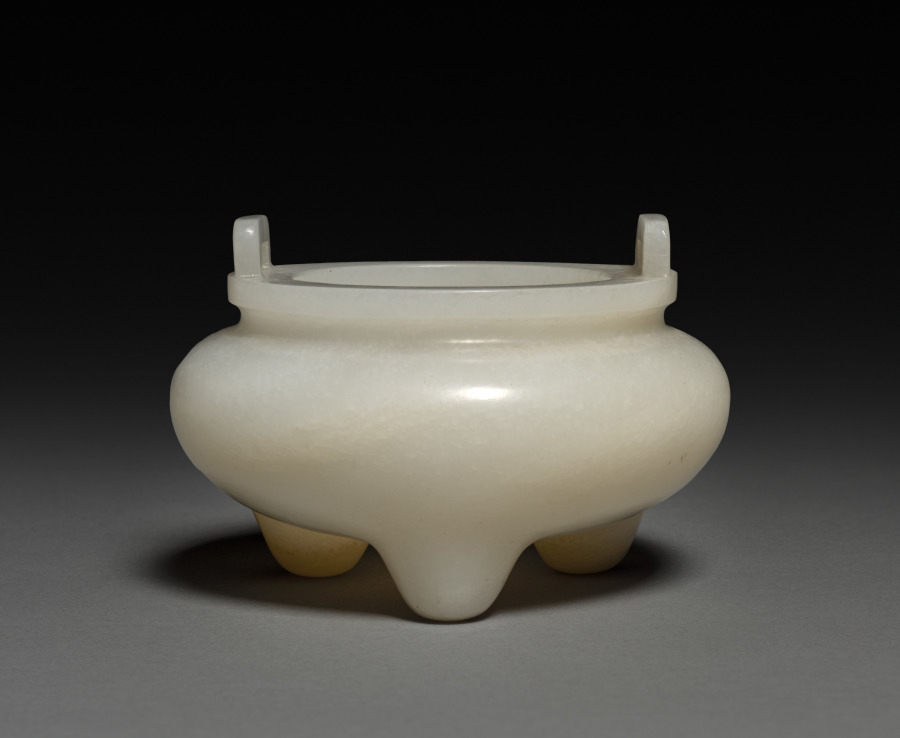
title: Tripod Incense Burner, Ding Shape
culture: China, Qing dynasty (1644-1911)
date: 1644–1911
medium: jade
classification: Jade